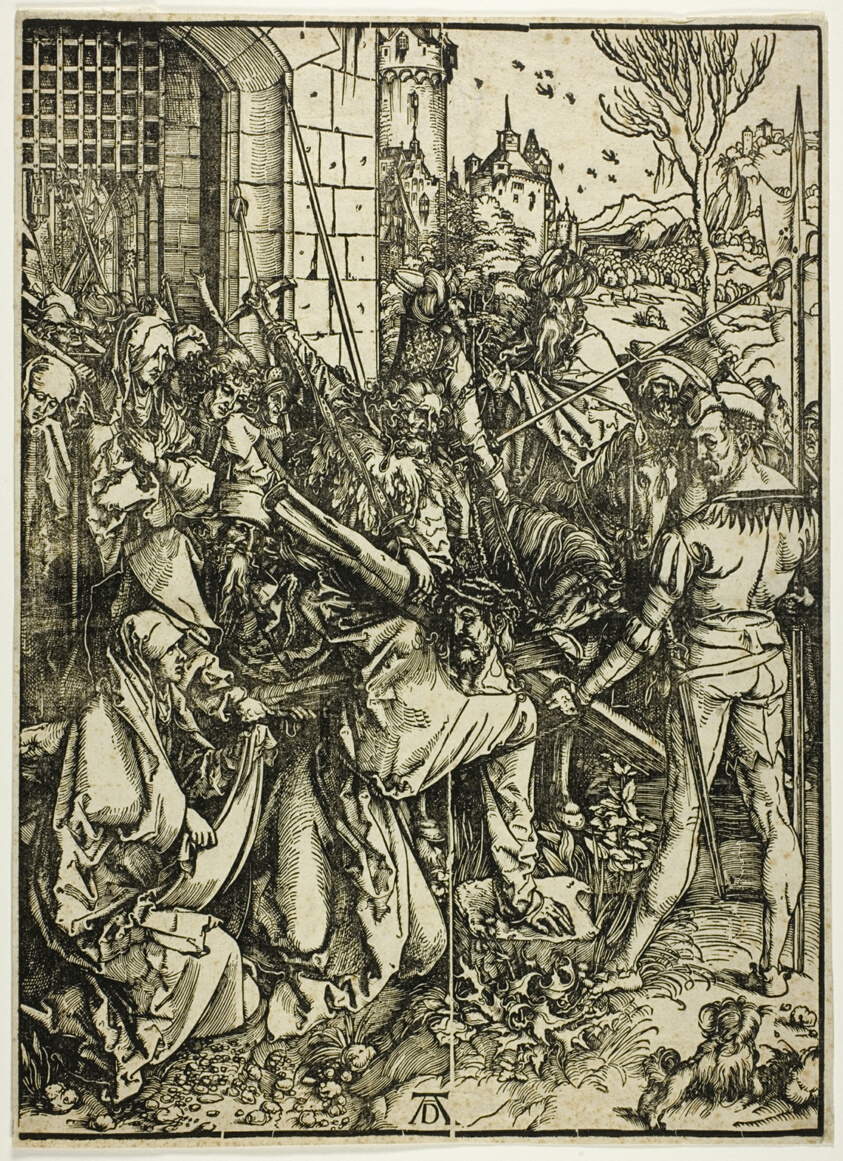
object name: Print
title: The Bearing of the Cross, from The Large Passion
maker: Albrecht Dürer (German, 1471-1528)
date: c. 1498–99, printed c. 1675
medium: Woodcut in black on ivory laid paper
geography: Germany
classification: woodcut; print; prints and drawing; paper